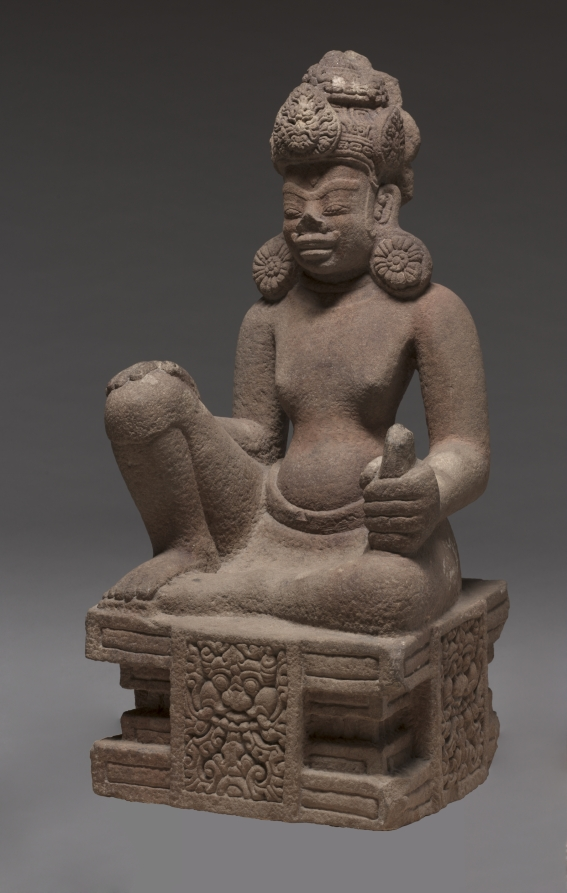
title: Enthroned planetary deity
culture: Central Vietnam (Champa), Quang Nam province, Dong Duong monastery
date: 850–75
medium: Sandstone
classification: Sculpture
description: Enthroned Planetary Deity is a powerful presence about three feet tall, made of a light-colored sandstone. He is a personification of one of the nine planets that protected a Buddhist temple; the short dagger in his left hand along with the mustache and stylized furrowed brow refer to his role as a fierce protector. His posture is that of royal ease, and his crown, massive earrings, and throne also mark him as a king of the heavens. The mark on his forehead refers to his association with enlightened beings. The meaning of a planetary deity as a guardian pertains to the consecration of the temple at a time when the planets were correctly aligned with the stars, so that the site and devotees will be protected from misfortune. The “face of glory” (kirtimukha) on the carved relief panel in front of his pedestal is an image pertaining to the creative energy (shakti) that is emitted from the temple itself; it spits jewels and vegetal motifs that connote abundance and prosperity that will accrue to the worshipers who come to the temple. This sculpture is one of the rare surviving examples from the Cham culture of central and southern Vietnam. It is documented to have come from the Dong Duong monastery, dedicated to Mahayana Buddhism.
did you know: Sanskrit dedicatory inscriptions show that the temple and monastery complex at Dong Duong founded in 875.